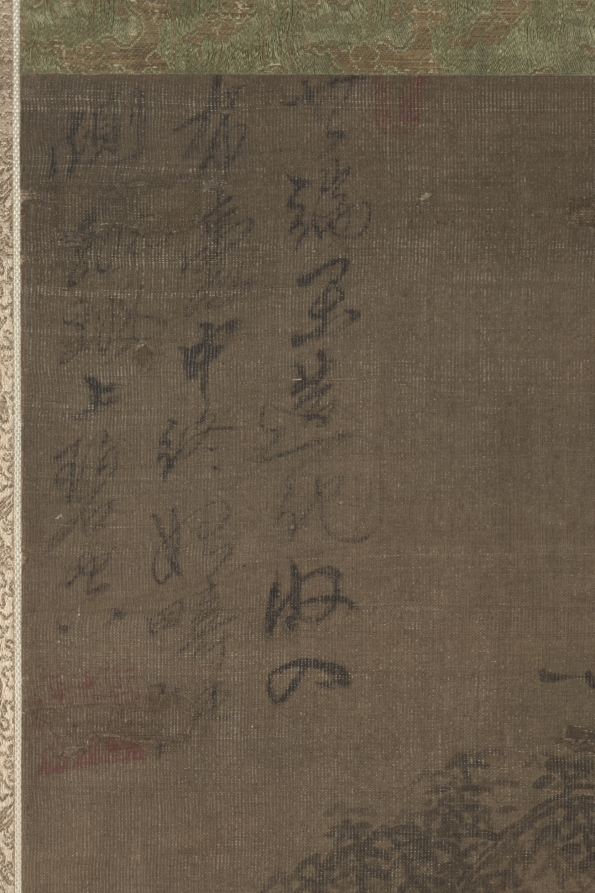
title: Li Tieguai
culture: China, Yuan dynasty (1271-1368)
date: 1300s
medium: Hanging scroll; ink and color on silk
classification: Painting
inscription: Inscribed in upper left corner: The universe which has no limit/ Is all collected in the cloth bag/ At the roadside which has no beginning or end/ One floats up to the blue sky.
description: It is said that Li Tieguai’s ethereal self visited the deified Laozi but when he returned, he found that his own body was burned. He had to inhabit the corpse of a person who used a crutch to walk, and thus gained his name Tieguai—the Iron Crutch. The painting depicts Li Tieguai after he took possession of the body, with the iron staff in his hand. As Li exhales, he blows a small Li Tieguai in the air, showing the immortal’s ability to send his spirit on journeys.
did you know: Li Tieguai is one of the Eight Daoist immortals.